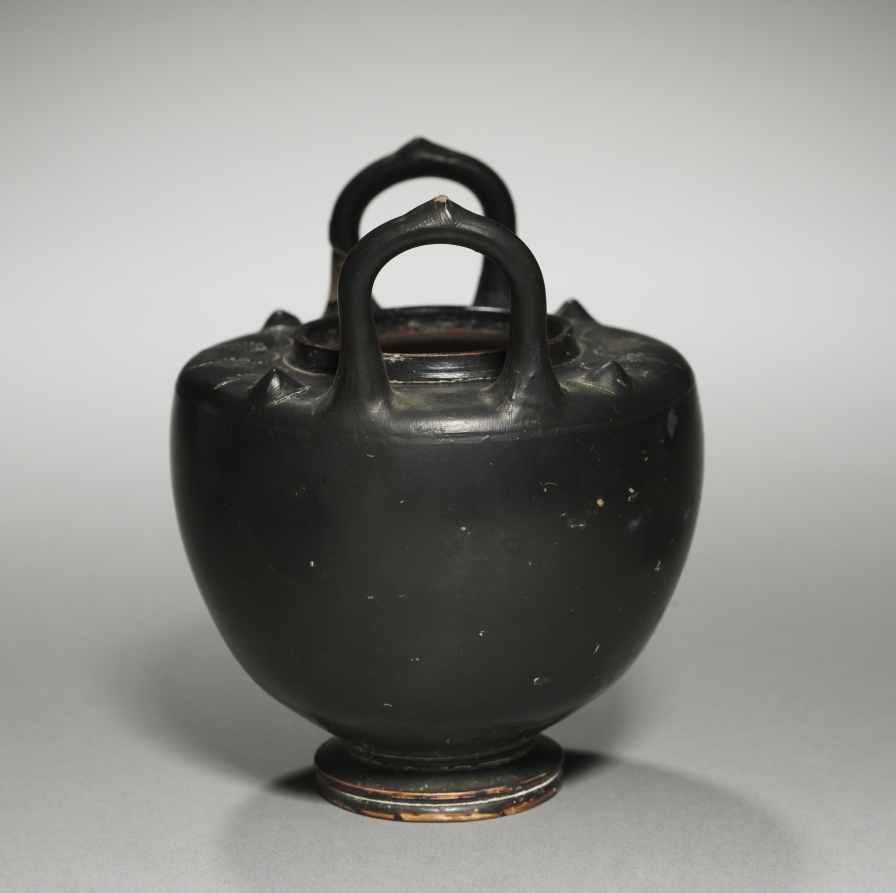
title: Black-Gloss Lebes Gamikos (Nuptial Bowl)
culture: Greek or South Italian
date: c. 425–375 BCE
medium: ceramic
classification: Ceramic